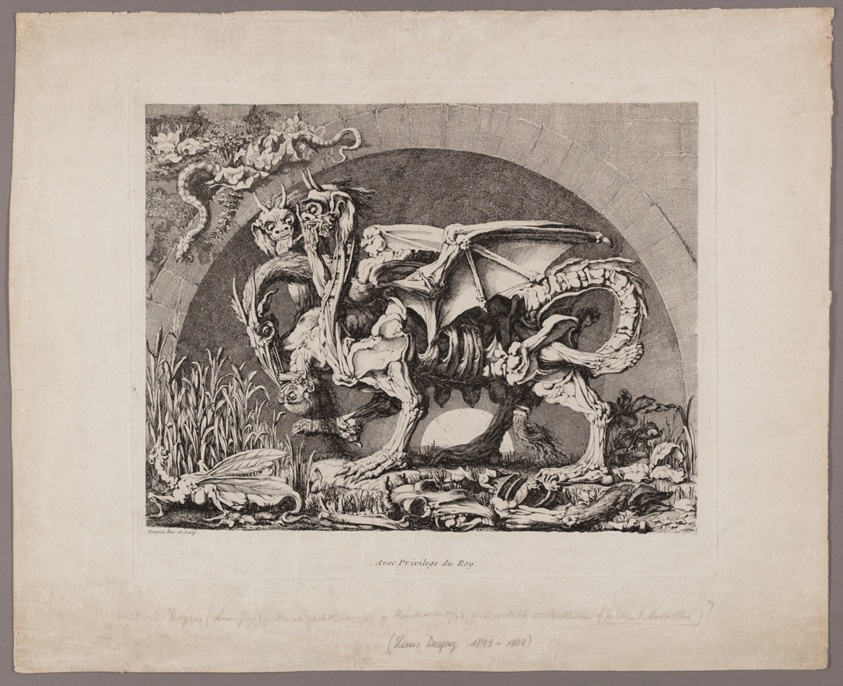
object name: Print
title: The Chimera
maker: Louis Jean Desprez (French, 1743-1804)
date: 1771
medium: Etching in black on cream laid paper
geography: France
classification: print; etching; prints and drawing